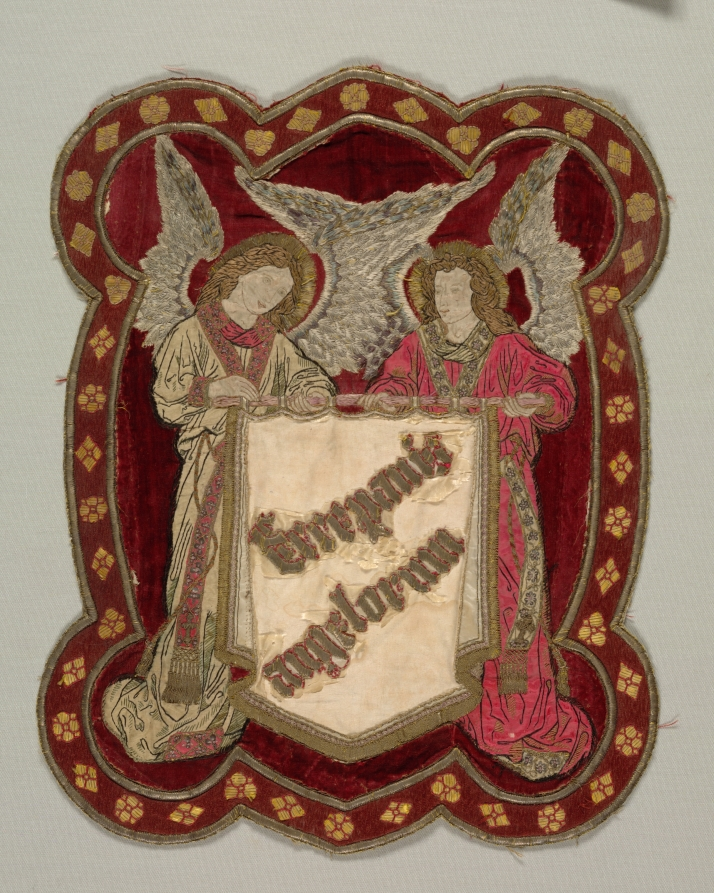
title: Silk Embroidery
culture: Austria ?, 19th century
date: 1800s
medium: embroidery, silk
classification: Embroidery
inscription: inscribed on the cloth banner held by two angels: "Ecce panis angelorum."